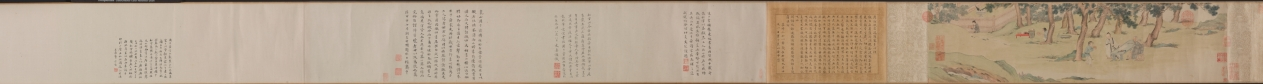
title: Zhao Mengfu Writing the Heart (Hridaya) Sutra in Exchange for Tea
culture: China, Ming dynasty (1368–1644)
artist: Qiu Ying (Chinese, 1494–1552)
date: 1542–43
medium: handscroll, ink and light color on paper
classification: Painting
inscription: Inscription accompanying text of "Heart" sutra, by Wen Zhengming 文徵明 (1470-1559): Zhengming 徵明, written in a boat at Kunshan 崑山, on the twenty-first day of the ninth month, in the renyin 壬寅 year, the twenty-first year of the Jiajing era [1542].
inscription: Colophon by Wang Shih-mou: Chou Yü-shün [Feng-lai] of K'un-shan was a scholarly, refined connoisseur of antiquities. He had acquired the poem written by Chao Ch'eng-chih [Chao Meng-fu] about the exchage of tea for Chao's calligraphy of the Prajna sutra. But the sutra itself, also written by Chao Meng-fu, is lost. He therefore asked Ch'iu Shih-fu [Ch'iu Ying] to do a painting and had Wen Cheng-ming, the artist-in-attendance, write the Hridaya Sutra in the "small, regular" style for replacement. Both works are so excellent that even Chao Meng-fu himself would certainly applaud if he should be reborn to see them. I, Shih-mou, had gotten possession of this scroll from the family of Chou Yü-shün, and since it was so wonderfully matched with one of the treasures in my collection. the Hridaya Sutra written by Chao Meng-fu for Priest Li in "running script," like the reuniting of two halves of a jade pi, I completed the scroll with the several colophons written for the "tea-exchange" poem. I did this because the painting of Ch'iu Ying and the calligraphy of Wen Cheng-ming are definitely masterpieces by themselves with absolutely no need to depend on any of the colophons written for the Chao Meng-fu poem. Furthermore, the two sons of Wen Cheng-ming, Shou-ch'eng [Wen P'eng] and Hsiu-ch'eng [Wen Chia]. have each written a colophon explaining the reason for replacing the calligraphy. As their writings are both acceptable for high standard, I didn't want to throw them away. [So by separating these into two scrolls] I was able to get two complete works of art in one clever stroke. I was quite pleased with myself, and hope that those who see this scroll shall not get suspicious because of the missing colophons. Wang Shih-mou wrote in his Jih-sun-chai study, on the first day of the tenth month, in the chia-shen year of the Wan-li era [1584].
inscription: Colophon by Wen P'eng: I-shao [Wang Hsi-chi] wrote in exchange for a flock of geese. Su Tung-po wrote in exchange for meat. Both episodes have become legends of a thousand years. Sung-hsüeh [Chao Meng-fu] "teased" Priest Kung for tea, and the story was immediately immortalized in the poems by all the famous scholars of the times. Indeed, how could one say his humor and elegance are not equal to the ancient worthies? Unfortunately, the poetry has survived but the writing of the sutra is lost. Yü-shün [Chou Feng-lai] therefore asked my father to make up the writing and so here is the complete work of art. Respectfully inscribed by Wen P'eng in the mid-summer of 1543.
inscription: Colophon by Wen Chia: Sung-hsüeh [Chao Meng-fu], in exchanging tea leaves for his writing of the Prajna, had put himself in the company of Yu-chün [Wang Hsi-chih] who exchanged geese for his writing of the Huang-t'ing sutra [the Yellow Chamber, or the Wai-ching ching, a Taoist text attributed to the Yellow Emperor]. However, was this romantic and cultivated gesture really intended for such small things? Actually, he was only proud that the excellence of his calligraphy had made him worthy to be the successor of the Ch'in Dynasty master. Since, very unfortunately, Chao Meng-fu's writing [of the Prajna] was already lost, my father therefore agreed to replace it, and did the calligraphy in the style of the Yellow Chamber. In addition, Yu-shün [Chou Feng-lai] had asked Mr. Ch'iu Shih-fu [Ch'iu Ying] to do a painting of the sutra writing story in the style of Li Lung-mien at the head of the scroll. Now it would seem the entire episode should go down in history for immortality. Respectfully recorded by Wen Chia, on the eighth day of the eighth month, in the year of k'uei-mao [1543]. trans. WKH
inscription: 4 colophons and 23 seals: 1 colophon, dated 1543, and 2 seals of Wen Peng (1498-1573); 1 colophon, dated 1543, and 2 seals of Wen Chia (1501-1583); 1 colophon, dated 1584, and 3 seals of Wang Shih-mou (1536-1588); 2 seals of Chou Feng-lai (16th c.); 3 seals of Sung Lo (1634-1713); 5 seals of the Ch'ien-lung emperor (r. 1736-95); 1 colophon, dated 1902, and 1 seal of Fei Nien-tz'u (1885-1905); 4 seals of Wan-go H. C. Weng (b. 1918); 1 seal unidentified.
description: The Yuan dynasty calligrapher Zhao Mengfu (1254–1322) is said to have transcribed the Heart Sutra for a certain priest named Li in exchange for tea. Later, during the Ming dynasty, the professional painter Qiu Ying from Suzhou painted this scene for his patron. Here, Zhao Mengfu holds a brush and has a piece of paper laid out before him. On the table is an ink stone, an ink stick, and a small water dropper. Drops of water would dissolve the ink stick into liquid ink when it was ground on the flat square stone.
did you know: Qiu Ying was born to a peasant family, but his natural talent led him to a successful career as a professional painter with wealthy patrons.